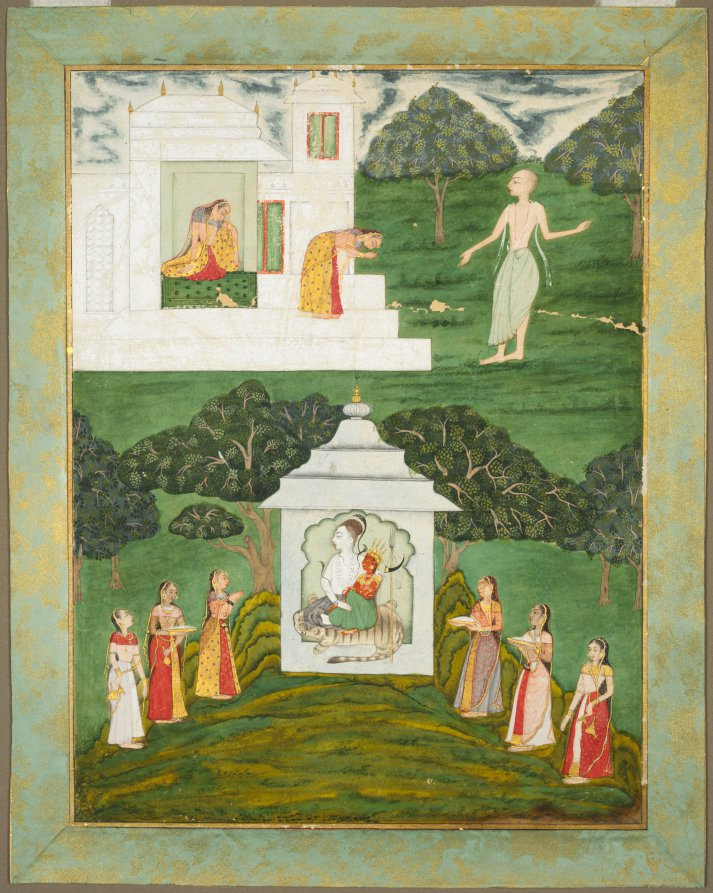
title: Worship of Shiva and Devi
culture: Northwestern India, Rajasthan, Rajput Kingdom of Bikaner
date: early 1700s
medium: Gum tempera, ink, and gold on paper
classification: Painting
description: In the shrine in the lower half of the painting, the Hindu god Shiva appears in human form along with his wife, depicted as a red goddess. Shiva has the appearance of a yogi, his matted locs coiled on top of his head, a chain of skulls around his neck. He wears cobras as jewelry, and his body is white with ashes of the cremated dead. The crescent moon perches at his third eye of knowledge. Six women bear offerings in vessels of brass—a pure material suitable for sacred food and drink. The narrative scene featuring a heroine at three moments of time remains unidentified.